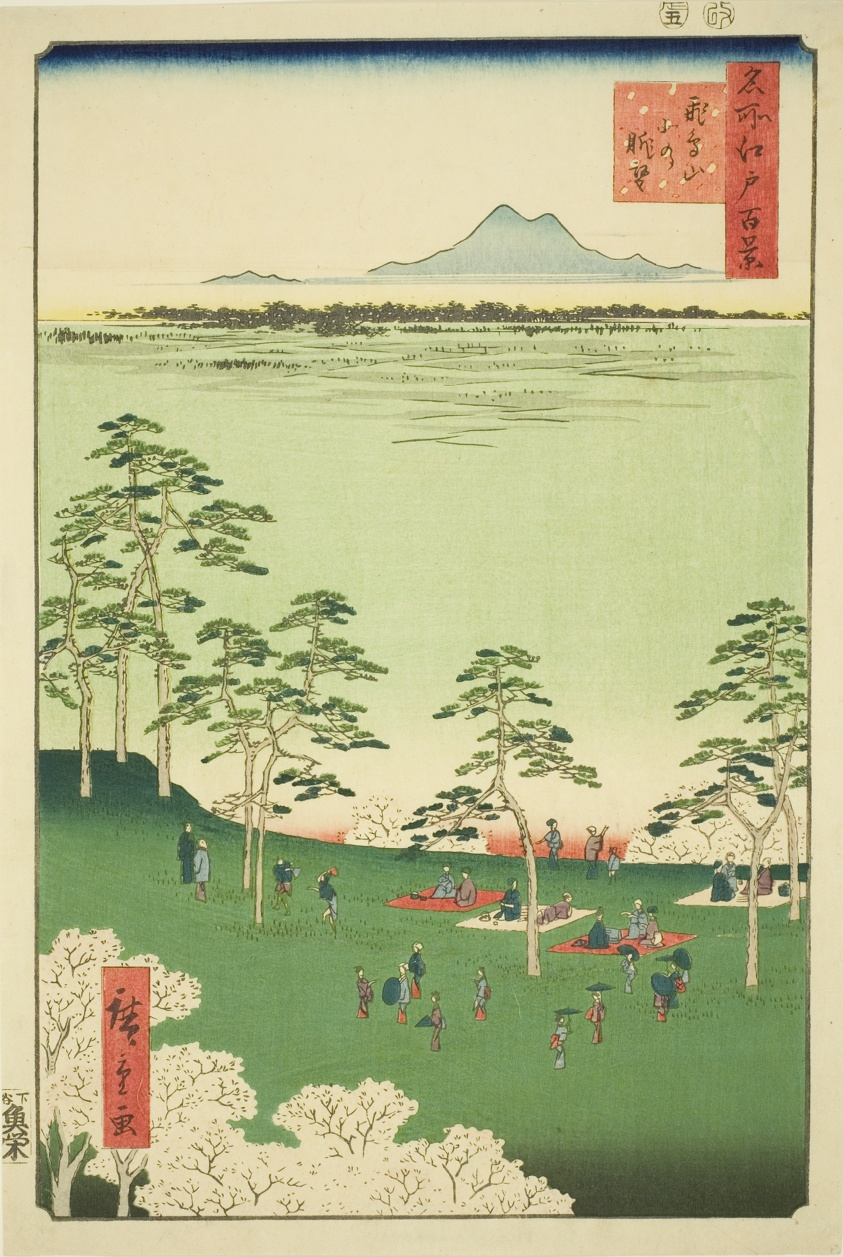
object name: Print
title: View to the North from Asuka Hill (Asukayama kita no chobo), from the series "One Hundred Famous Views of Edo (Meisho Edo hyakkei)"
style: Japanese (culture or style)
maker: Utagawa Hiroshige 歌川 広重; Japanese, 1797-1858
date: 1856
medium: Color woodblock print; oban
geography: Japan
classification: woodblock print; print; asian art